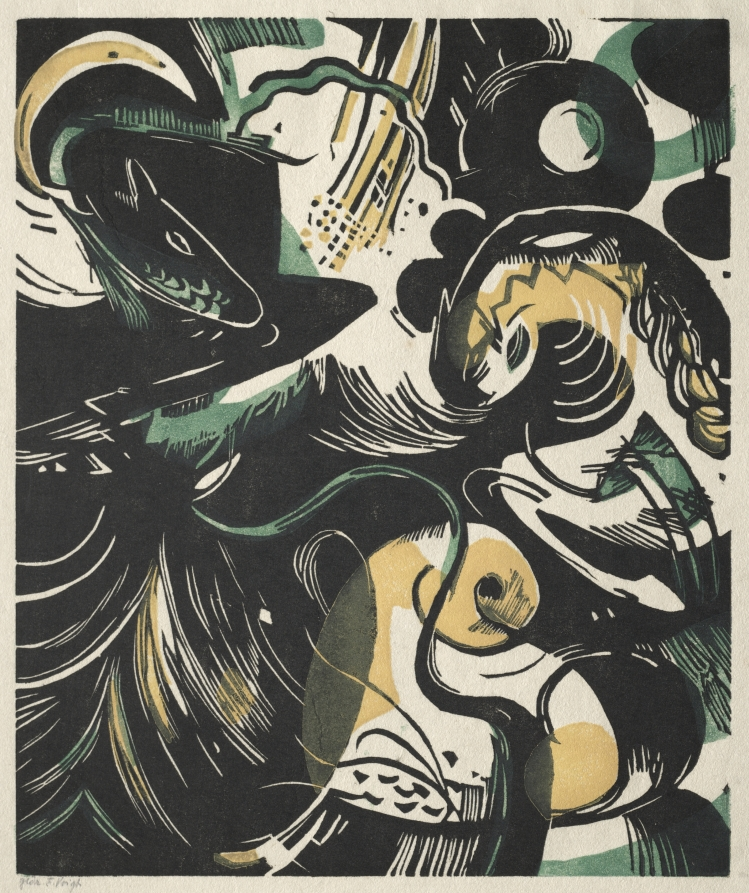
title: Genesis II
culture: Germany, 20th century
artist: Franz Marc (German, 1880–1916)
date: 1914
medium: color woodcut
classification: Print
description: Like other members of Der Blaue Reiter in Munich, Franz Marc focused on depicting animals, which symbolized joyous rebirth. Genesis II was made to illustrate the creation story in the book of Genesis; he planned to include it in an illustrated Bible. Here, three horses emerge from a background of chaos and movement. His Tiger is less joyous and more threatening than the bounding horses; with clenched teeth, the tiger leers toward a cowering animal behind it. After enthusiastically enlisting in the German army, Marc died in battle at Verdun, France, on March 4, 1916. His wartime death—and that of fellow artist August Macke—had a profound impact on the Munich Expressionists, whose vision of an earthly paradise quickly dissolved.